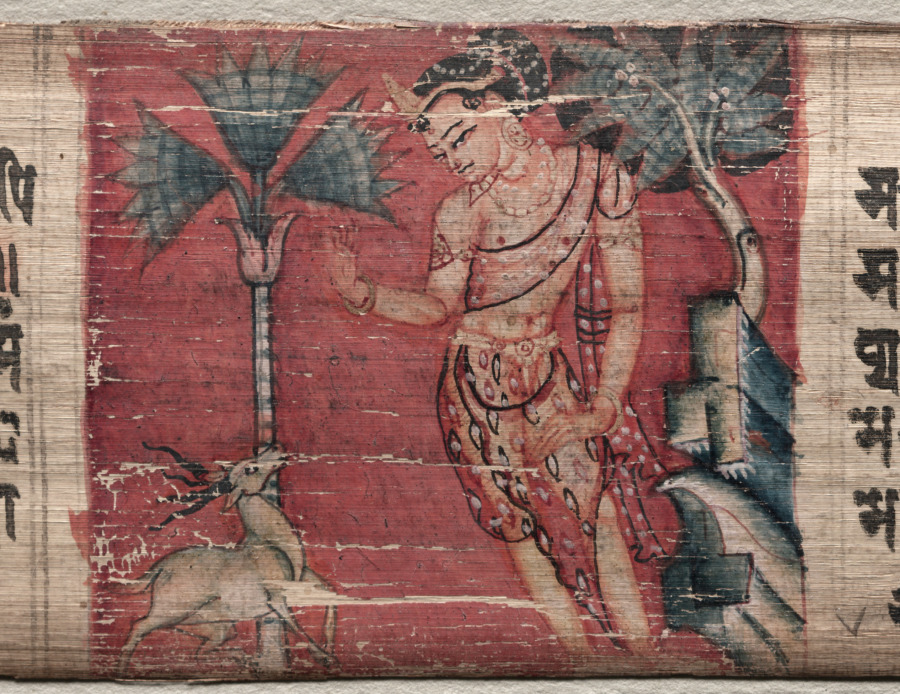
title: Sudhana and an antelope, folio 73 (recto) from a Gandavyuha-sutra (Scripture of the Supreme Array)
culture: Nepal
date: 1000–1100s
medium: gum tempera and ink on palm leaf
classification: Painting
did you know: The deer has four horns, identifying it as the four-horned antelope (Tetracerus quadricornis), native to Nepal and India.